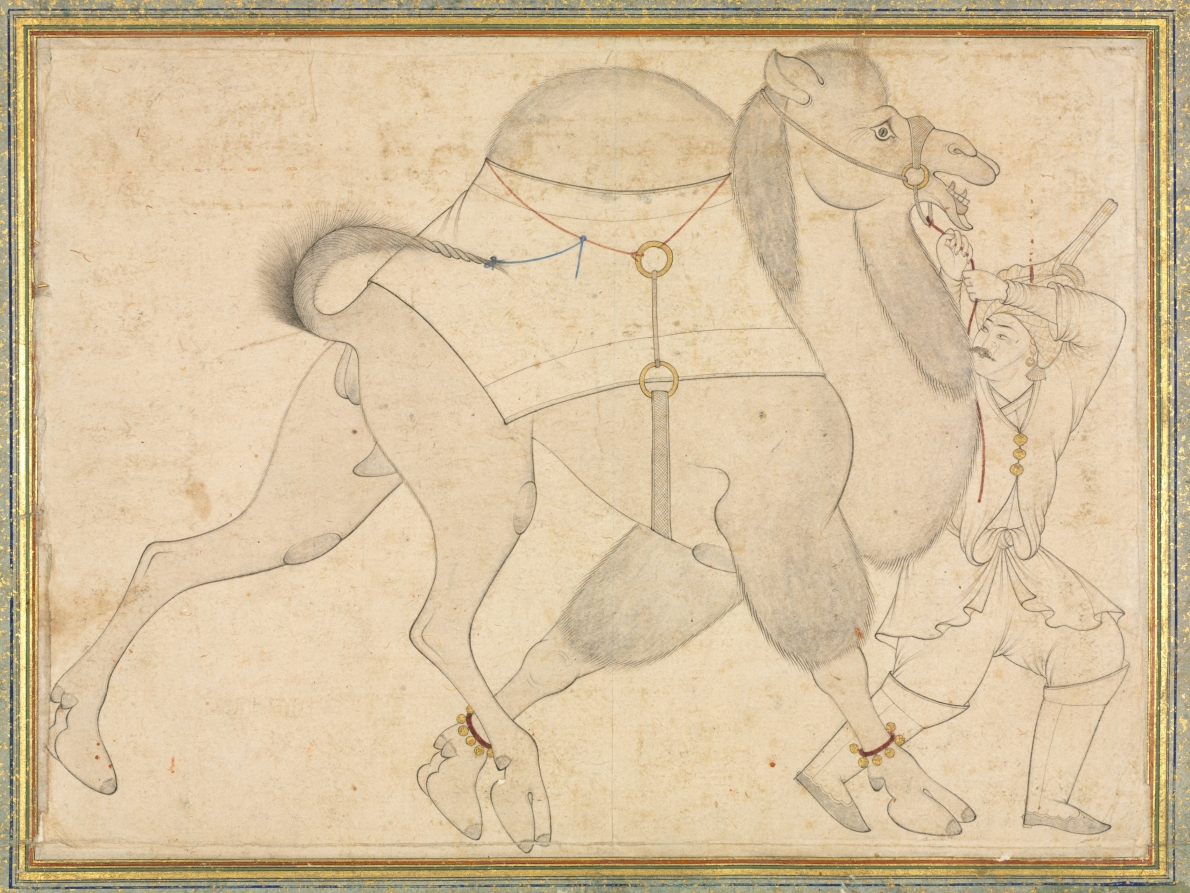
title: Camel and Groom; Single Page Illustration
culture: Iran, Qazvin, Safavid Period, 16th Century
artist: style of Shaykh Muhammad (Iranian)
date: c. 1545–1576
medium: ink, gold, and opaque watercolor on paper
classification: Drawing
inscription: script: none